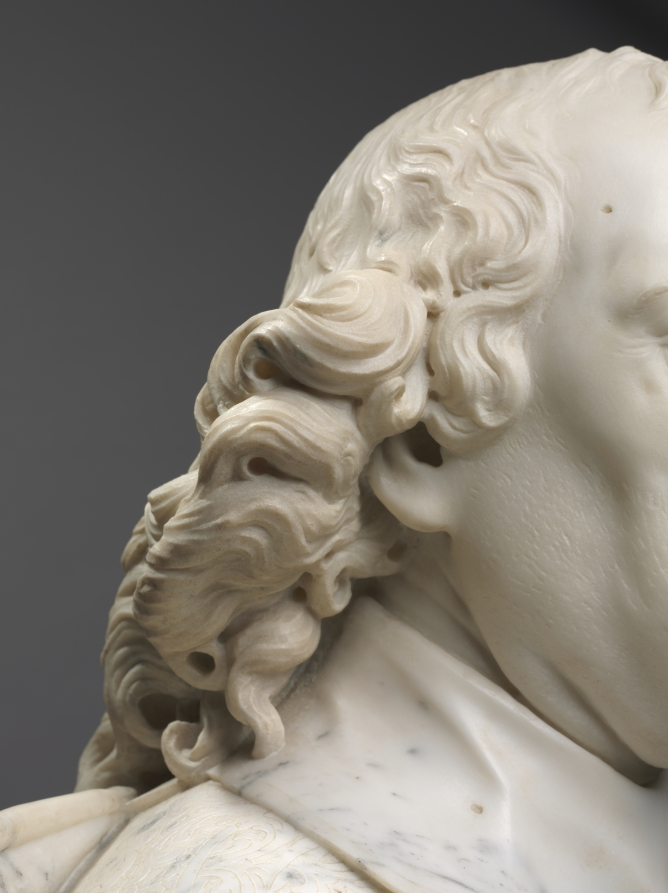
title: Portrait of Fabrizio Naro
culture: Italy, Rome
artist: Domenico Guidi (Italian, 1625–1701)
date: c. 1680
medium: marble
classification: Sculpture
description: This figure’s individualized facial expression, dynamic turn of the head and animated drapery are all characteristic of 17th-century Roman portrait sculpture. Guidi, a pupil of Alessandro Algardi, juxtaposed broad swaths of drapery and deeply drilled and carved hair with delicate surface detail, visible here in the patterning of the jacket and the faint suggestion of a beard. Based on a comparison with a later portrait on the family tomb in the church of Santa Maria sopra Minerva, Rome, the sitter has been identified as Fabrizio Naro (d. 1697), marquis of Mompei.